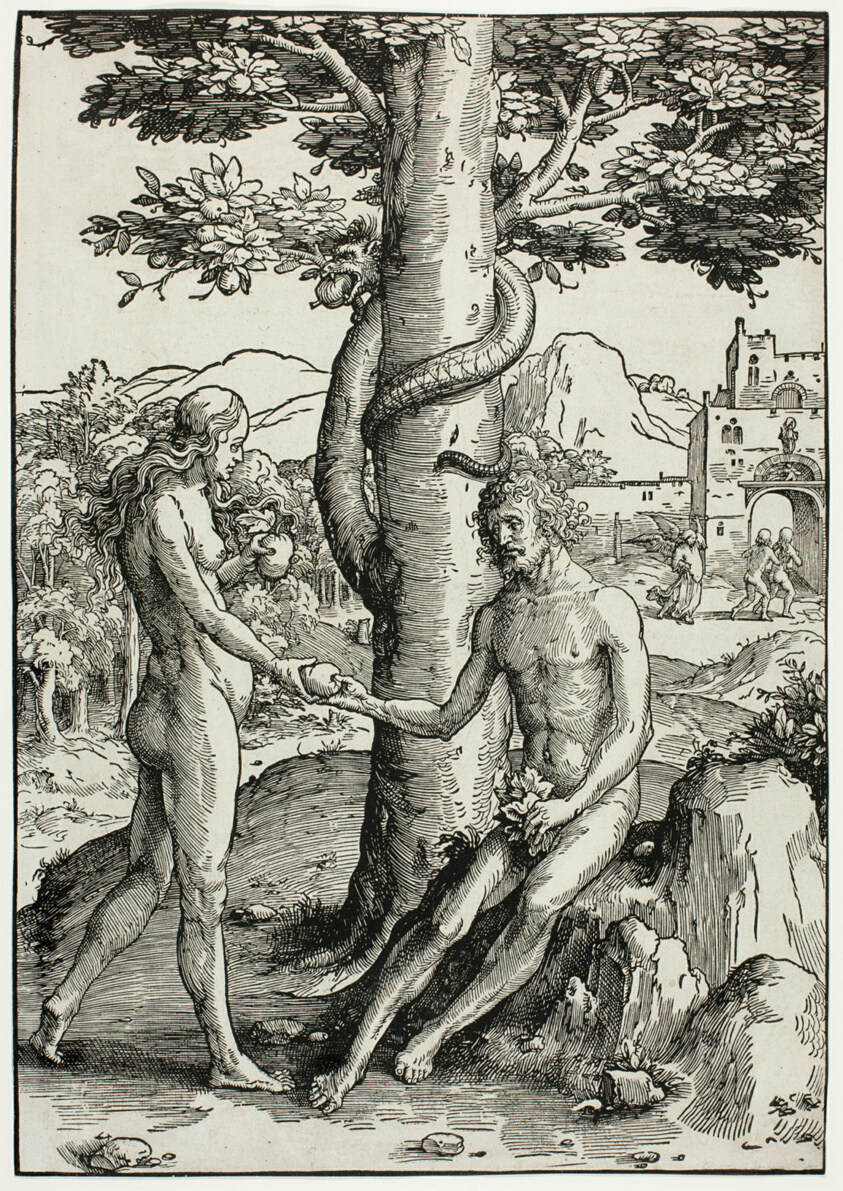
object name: Print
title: Adam and Eve (The Fall of Man)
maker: Lucas van Leyden (Netherlandish, c. 1494-1533)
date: c. 1514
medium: Woodcut in black on ivory laid paper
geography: Netherlands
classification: woodcut; print; prints and drawing